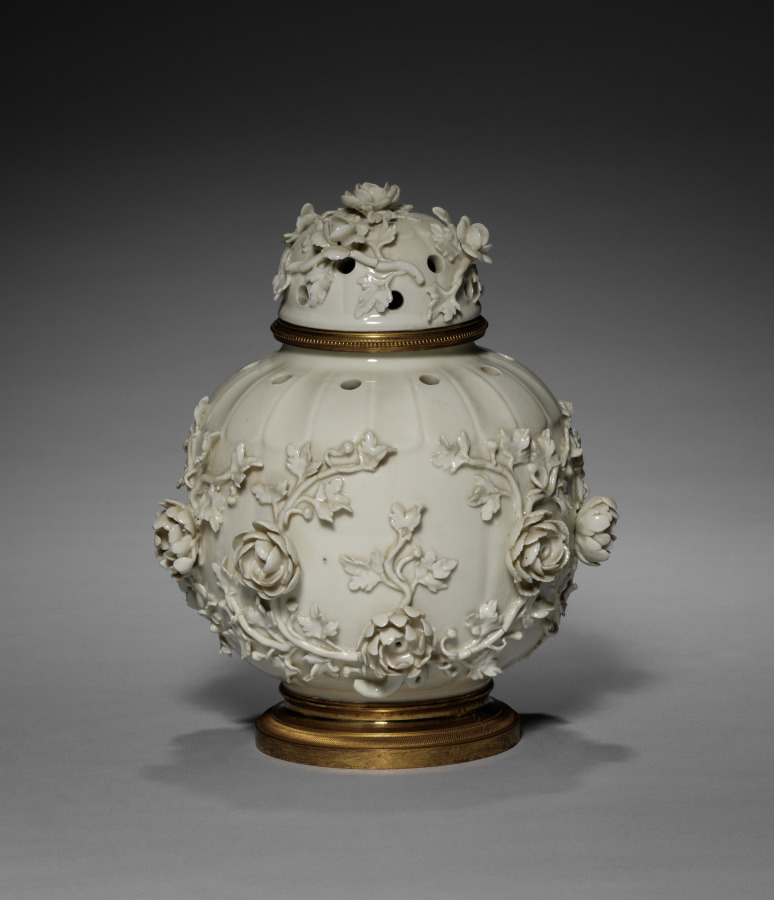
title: Potpourri Vase with Cover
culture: France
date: c. 1860–80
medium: blanc-de-chine porcelain; gilt bronze mount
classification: Ceramic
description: This vase was likely made by the celebrated Parisian ceramics firm of Edmé Samson (1810–91). To cater to the resurgence in taste for 18th-century designs, the Samson firm specialized in making reproductions of rare 18th-century European porcelains, especially those from firms that had already copied Chinese porcelains. In this case, this vase's design is taken from models produced by the Saint-Cloud factory in the 1750s after earlier Qing dynasty Chinese ceramics. However, the telltale sign that this vase is made by Samson and not Saint-Cloud is that the original would have been made from a soft-paste porcelain (fired at a lower temperature), while this example is made of hard-paste porcelain (fired at the highest temperature).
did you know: Potpourri vases always have holes in the top to let the scent of dried spices and flowers contained within freshen the air around them.